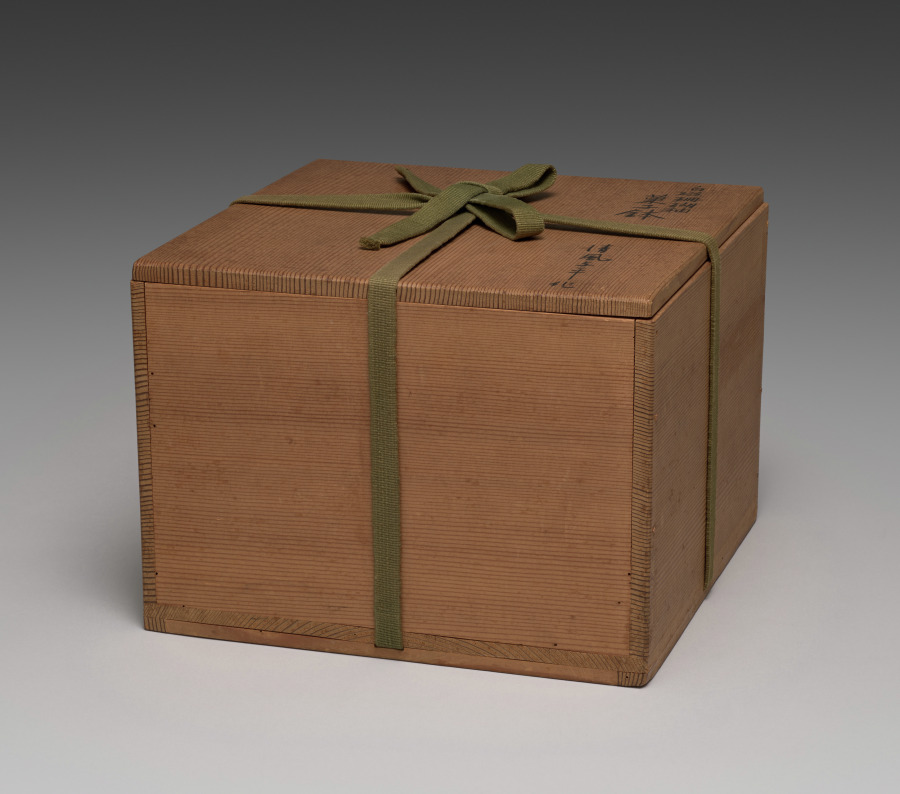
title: Sweets Bowl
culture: Japan, Taishō period (1912–26) or Shōwa period (1926–89)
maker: Seifū Yohei IV (Japanese, 1872–1951)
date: 1914–46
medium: Porcelain with coral red glaze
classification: Ceramic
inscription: 清風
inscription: 成山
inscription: 清風造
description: Like his father, Yohei IV also produced works with red monochrome glazes, like this red coral–glazed sweets bowl with white interior.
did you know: Seifū Yohei IV was active at home and abroad and won international recognition for his ceramic's glazes and designs.